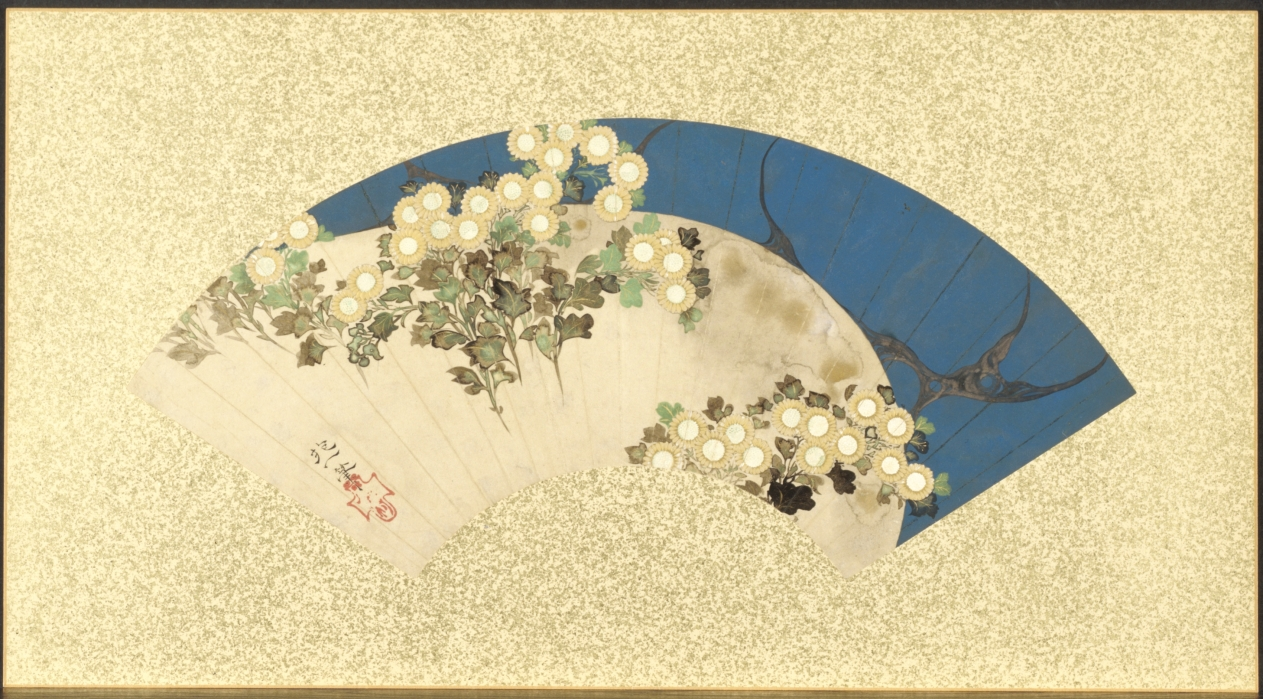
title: Chrysanthemums by the Water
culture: Japan, Edo period (1615–1868)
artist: Sakai Hōitsu (Japanese, 1761–1828)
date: 1761–1828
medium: fan painting: ink, color, and gold on paper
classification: Painting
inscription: signature at left: " Hoitsu painted," and seal: "oson."